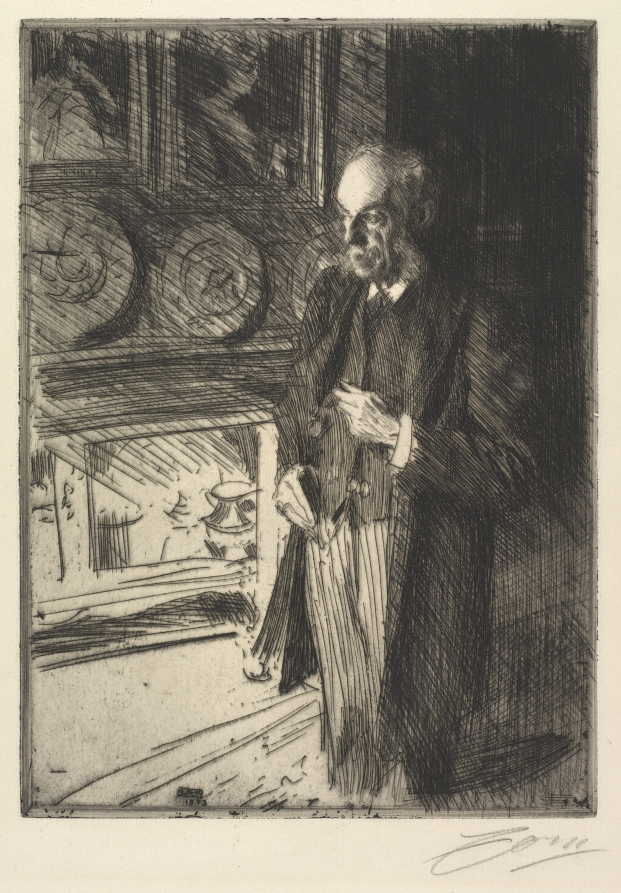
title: Herny Marquand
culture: Sweden, late 19th Century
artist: Anders Zorn (Swedish, 1860–1920)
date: 1893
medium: etching and drypoint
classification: Print